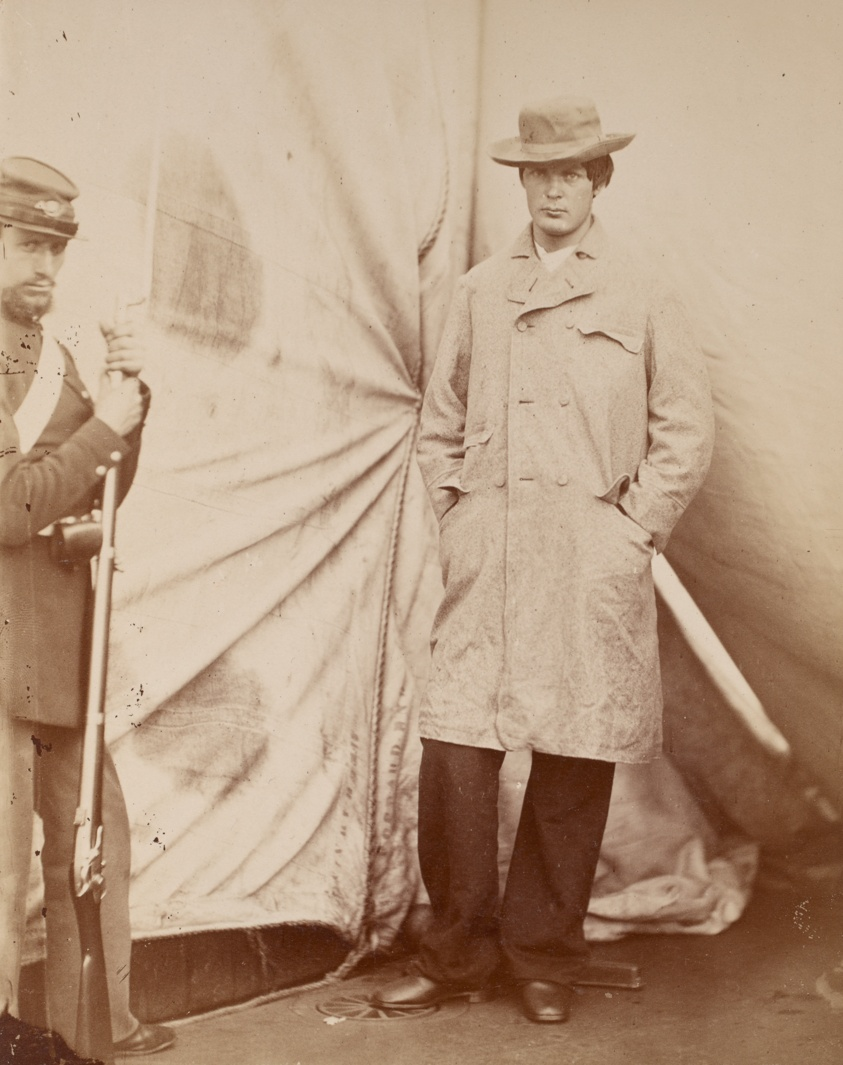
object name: Photograph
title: Lewis Powell [alias Lewis Payne]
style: 19th century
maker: Alexander Gardner; American, born Scotland, 1821–1882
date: April 27, 1865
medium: Albumen print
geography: United States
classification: photography; albumen print from collodion negative; photograph; photographic process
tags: lundberg collection, men, Male, portraits, portrait